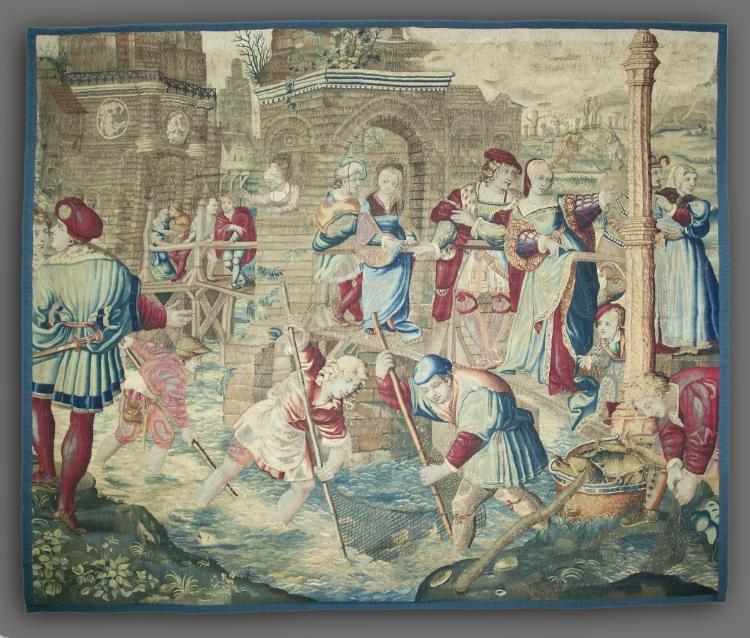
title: Spring: Fishing Scene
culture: France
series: Four Seasons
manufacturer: possibly by Gobelins Manufactory (France, Paris, est. 1662)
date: designed c. 1535, woven mid- to late 1600s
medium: Wool, silk, and gold filé: tapestry weave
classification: Tapestry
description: In this springtime scene, two fishermen wade in a river, dragging a net suspended between two poles. A noble couple on a bridge gestures toward other fishermen, who occupy the other side of this scene in other extant examples of this tapestry with a larger picture plane. In the background, townspeople walk on bridges that lead to the gateway of a town with brick walls and portals. In the far distance, farmers till the soil to sow new seeds, another typical activity associated with spring. The trees on the hills are just beginning to sprout new buds.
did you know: Spring was considered to be a season of courtship and romance; perhaps the gentleman on the bridge in the red cap is trying to catch the attention of the lady next to him.